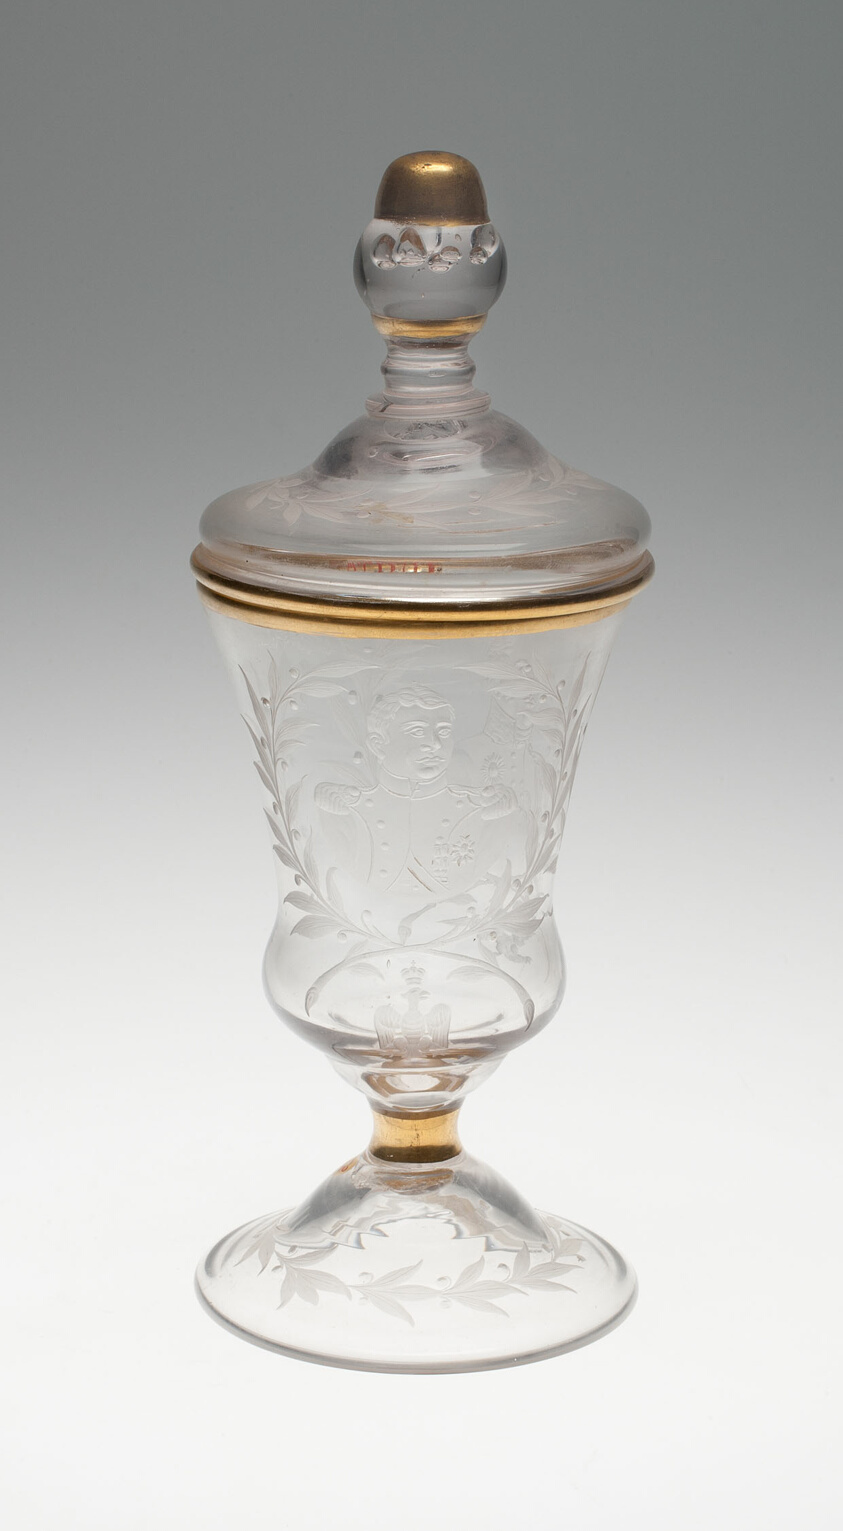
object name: Glass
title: Goblet with cover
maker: Germany, Zechlin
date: c. 1740 or early 19th century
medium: Glass; engraved and gilt decoration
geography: Flecken Zechlin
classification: drinking vessel; glass; european decorative arts